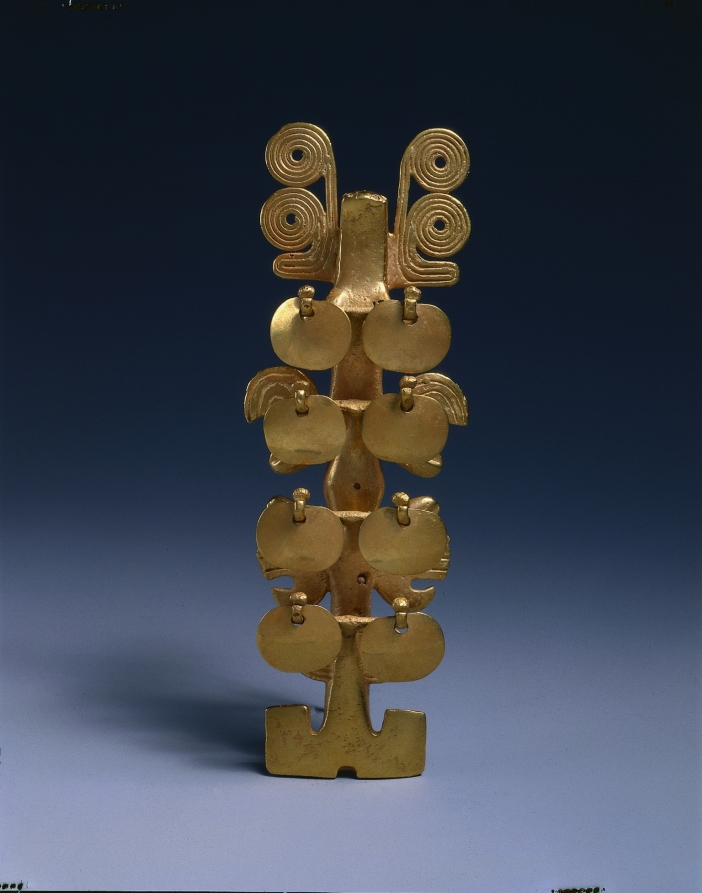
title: Pendant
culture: Panama, International Style, 5th-7th century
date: 400–700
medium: cast gold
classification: Metalwork